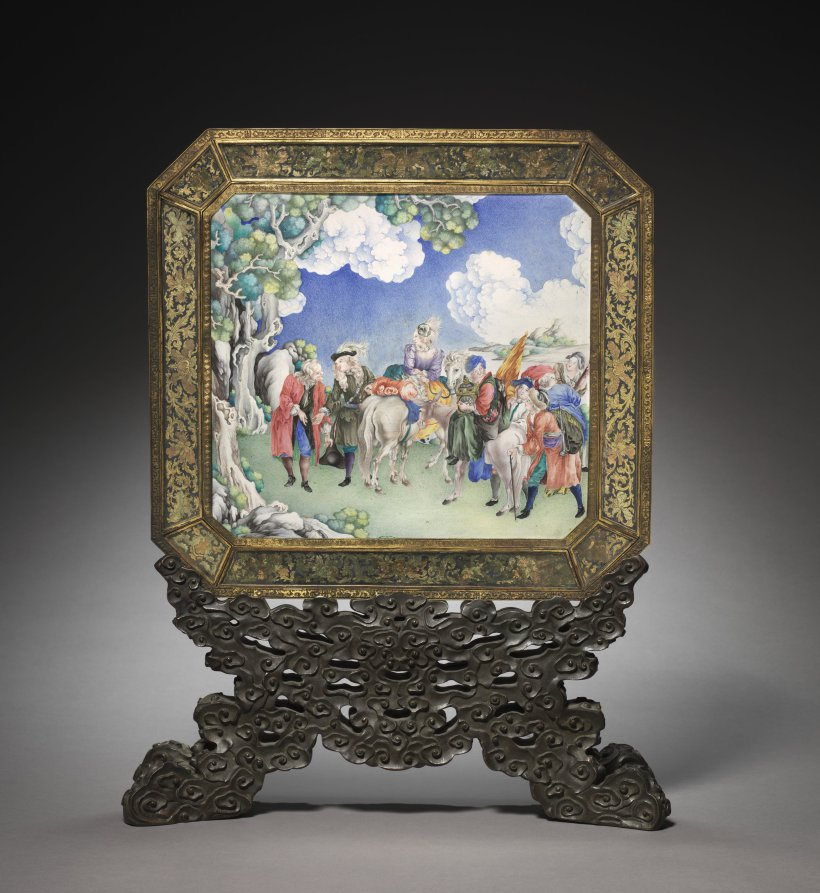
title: Screen with European Figures (obverse) and Landscape (reverse) with Stand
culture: China, Beijing palace workshops, Qing Dynasty (1644-1911), Qianlong reign (1736-1795)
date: 1736–95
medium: painted enamel, glass painting, and cast-iron stand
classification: Enamel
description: On the obverse side of this two-sided table screen is an enamel-painted copper plaque with European figures. The image is probably derived from prints. European enamelware was introduced to China through missionary-artists at the Beijing court and foreign trade in Guangzhou. On the reverse side is a glass painting of architectural landscape in the Chinese style. At the Qing court, imperial commands made possible artistic collaboration and the incorporation of different artistic expressions in a single artwork.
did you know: The screen is balanced on a heavy cast-iron base.